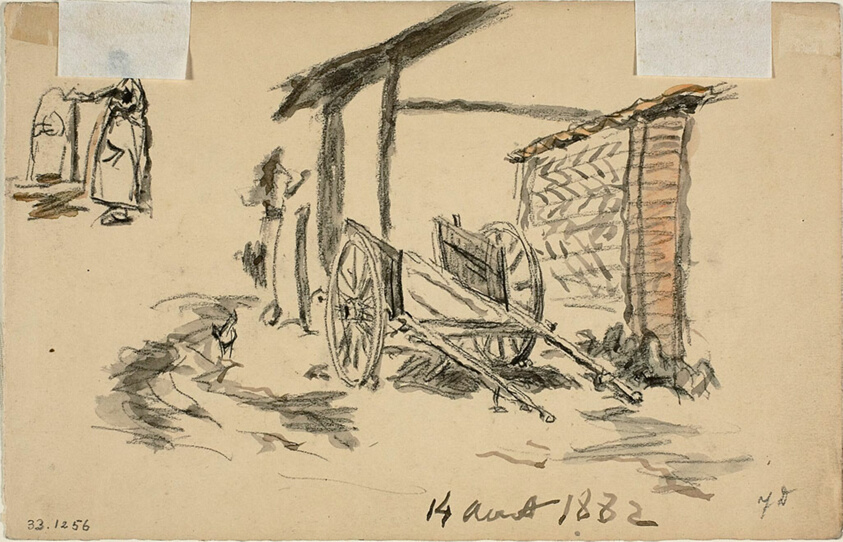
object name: Drawing and Watercolor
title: Chateau, Cote Saint Andre (recto) Empty Cart and Shed with Other Sketches (verso)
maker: Johan Barthold Jongkind (Dutch, 1819-1891)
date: 1882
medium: Watercolor, with black conte crayon, on cream wove paper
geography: Holland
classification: watercolor; drawings (visual works); prints and drawing